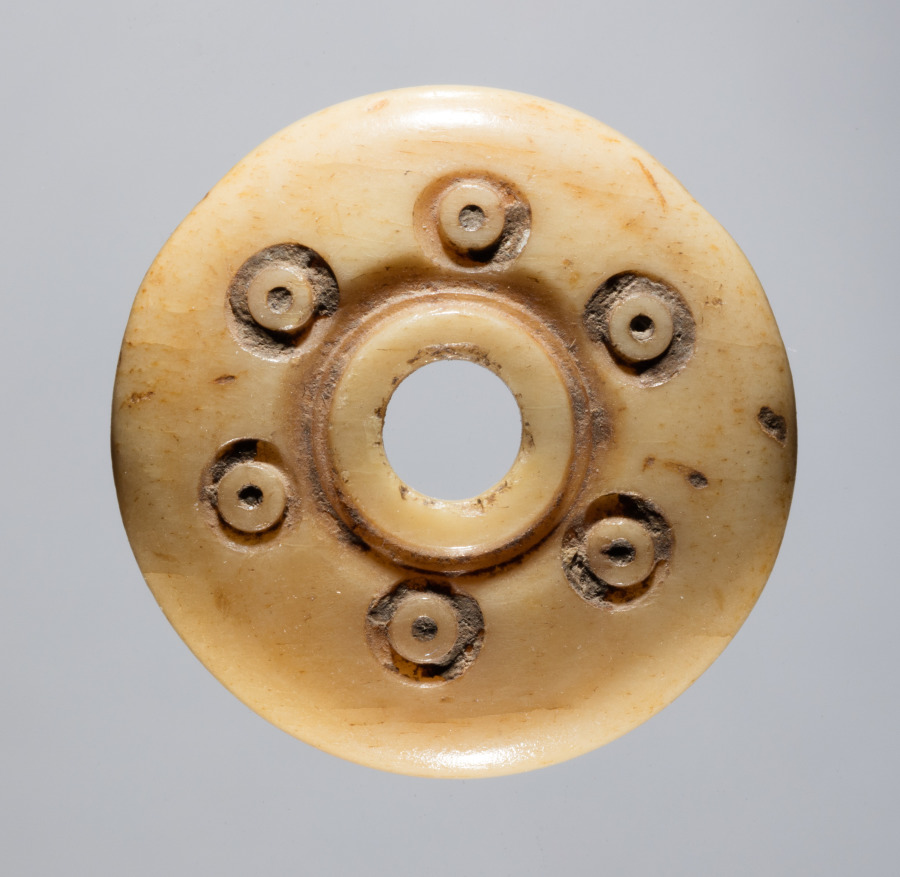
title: Spindle Whorl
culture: Iran, early Islamic period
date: 700s - 900s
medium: bone, incised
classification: Spindle Whorl